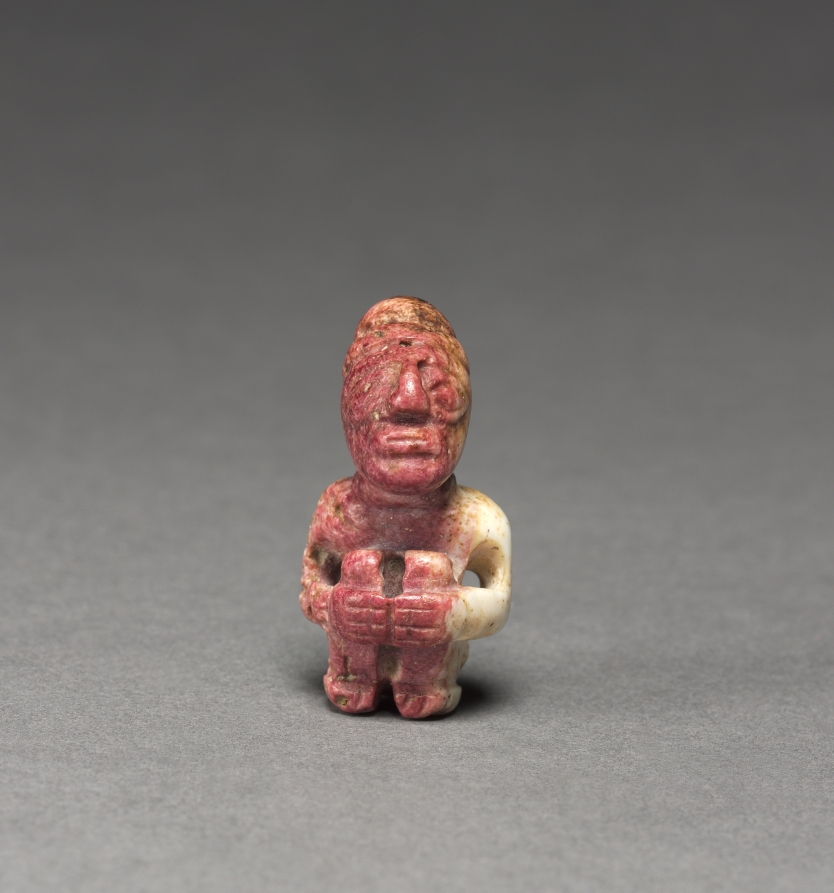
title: Seated Figurine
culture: Peru, Inca, 15th-16th century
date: c. 1400–1540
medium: stone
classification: Sculpture